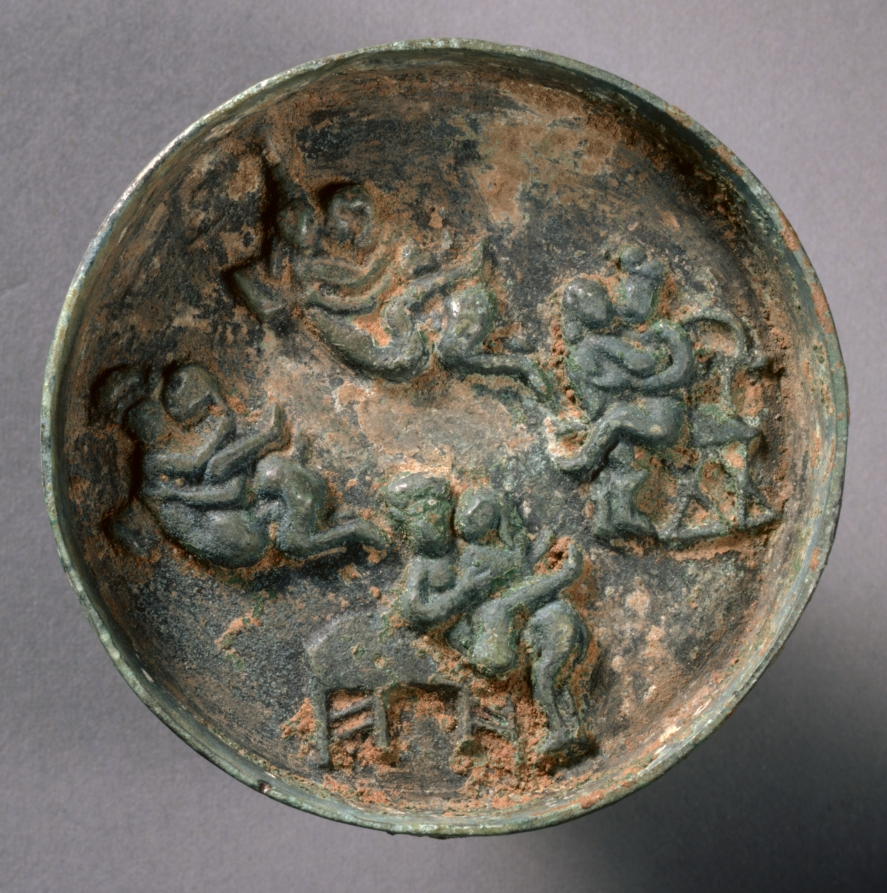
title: Small Erotic Mirror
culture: China, Yuan dynasty (1271-1368)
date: late 1200s–mid-1300s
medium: bronze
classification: Metalwork